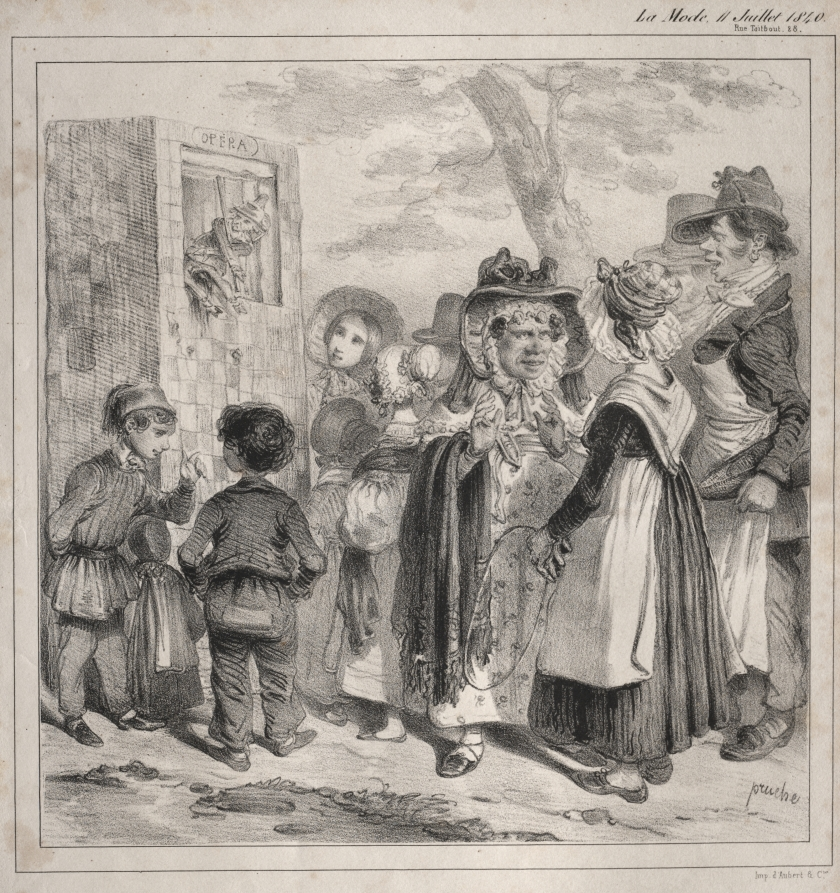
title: Voyez-vous ma Chère! c'est la police qui fait jouer ces polichinels là, pour détourner l'attention...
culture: France, 19th century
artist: Clémente Pruche (French, 1831–1870)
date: 1840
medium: lithograph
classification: Print